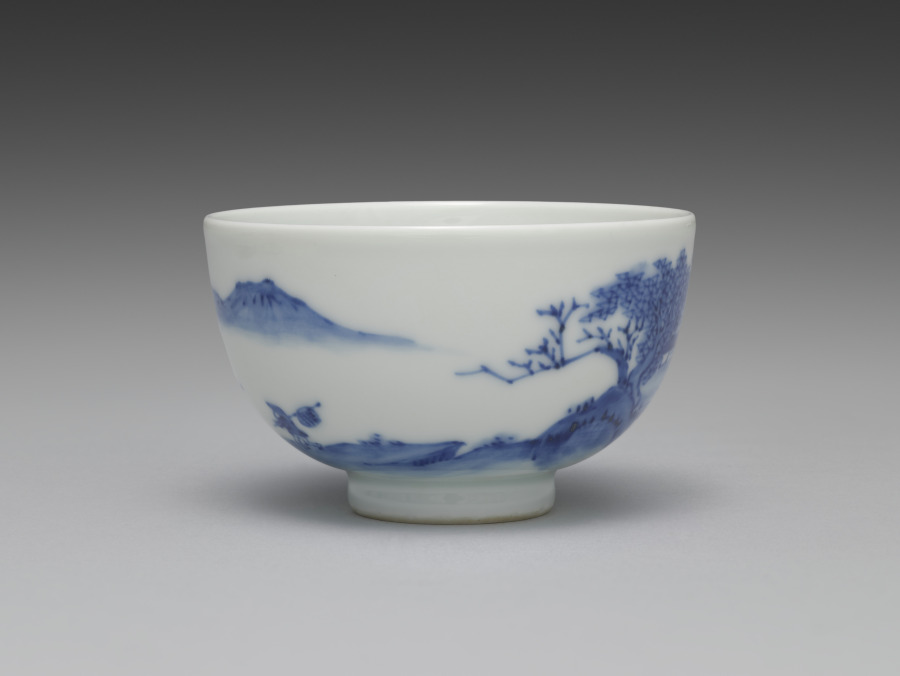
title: Teacup from Tea Set with Chinese Landscape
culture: Japan, Meiji period (1868–1912)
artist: Seifū Yohei III (Japanese, 1851–1914)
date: c. 1893–1914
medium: Porcelain with underglaze blue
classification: Ceramic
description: The theme of this sencha tea set is the Chinese scholar-recluse in an idyllic landscape. Each of the five teacups has a landscape with an architectural structure and some human activity. This tea set has a side-handled pot called a kyūsu, used for steeping, straining, and serving tea. Unlike some others, this set also has a yuzamashi, a container used to cool boiled water to just the right temperature for the best flavor when steeping. Seifū Yohei III’s painting teacher, Tanomura Chokunyū (1814–1907), made a visual record of famous sencha events that shows how these kinds of porcelains fit with objects such as a stove and kettle to form a complete set of utensils for tea preparation, and with ensembles of decorative objects meant to inspire creativity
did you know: A fourth cup shows a humbly dressed man with a broad-brimmed hat lugging a package tied to the end of a rod slung over his shoulder. In front of him is a two-story building flanked by deciduous trees and a man resting against the side of a sturdy stone bridge as he looks at a residence, or perhaps a set of roofed gates, further up the path.